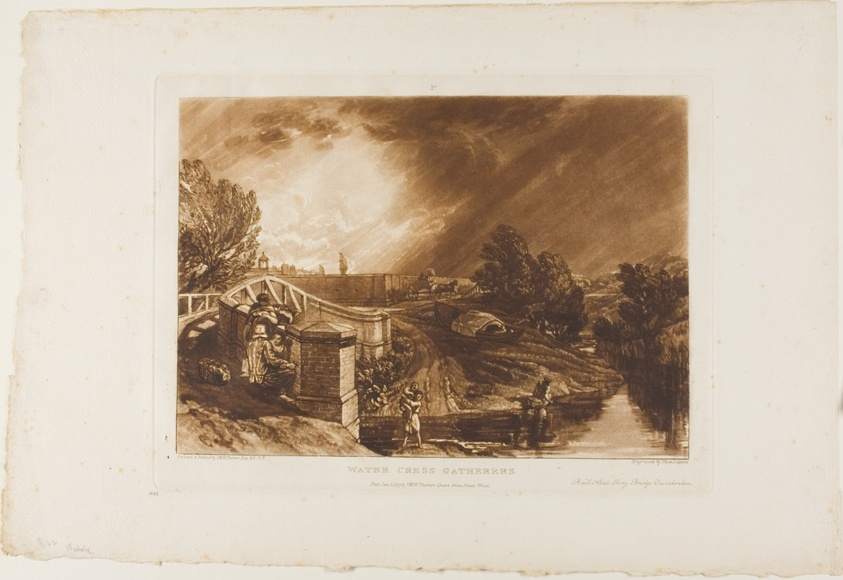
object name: Print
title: Watercress Gatherers, plate 62 from Liber Studiorum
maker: Joseph Mallord William Turner (English, 1775-1851); engraved by Thomas Goff Lupton (English, 1791–1873)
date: published January 1, 1819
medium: Mezzotint and etching in brown on ivory wove paper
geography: England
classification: mezzotint; print; prints and drawing